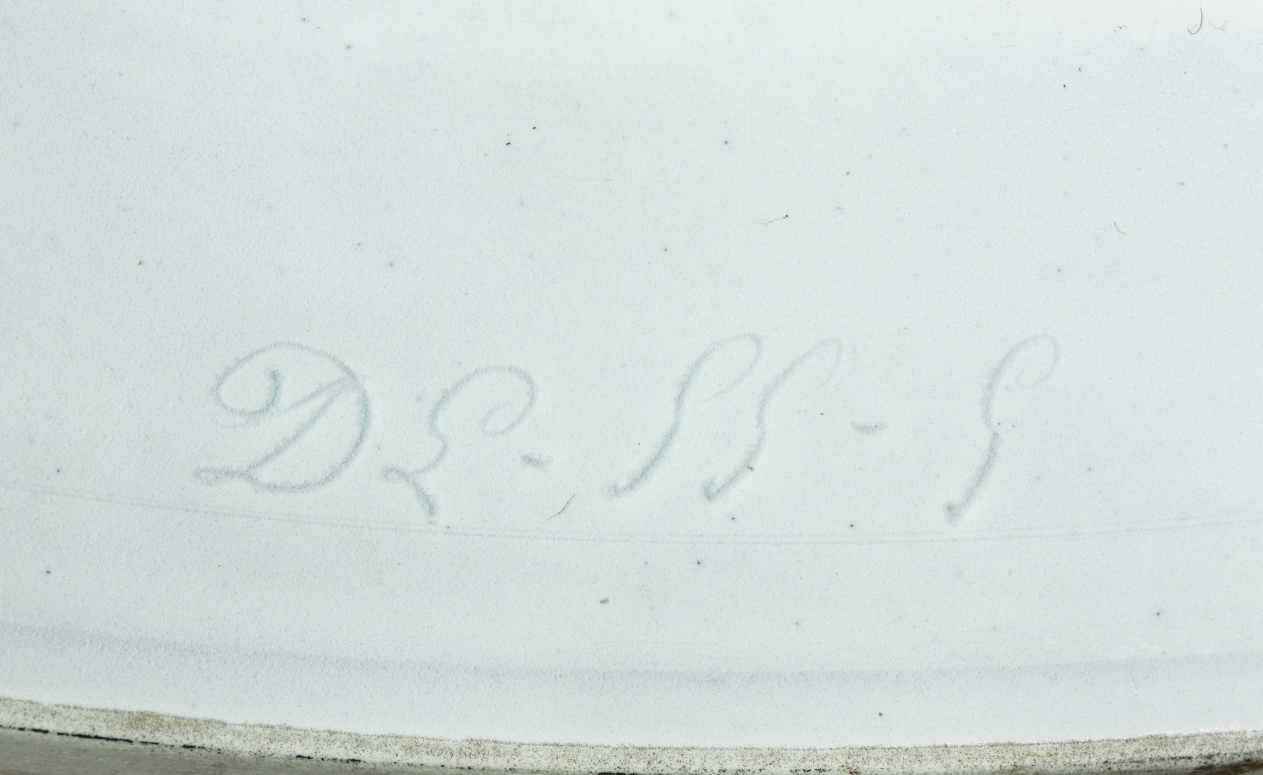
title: Vase Bertin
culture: France, 19th century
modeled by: Jules-Constant Peyre (French, 1811–1870?)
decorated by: Léopold Jules Gély (French)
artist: Sèvres Porcelain Factory (French, est. 1756)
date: c. 1855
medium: porcelain with pâte-sur-pâte decoration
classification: Ceramic